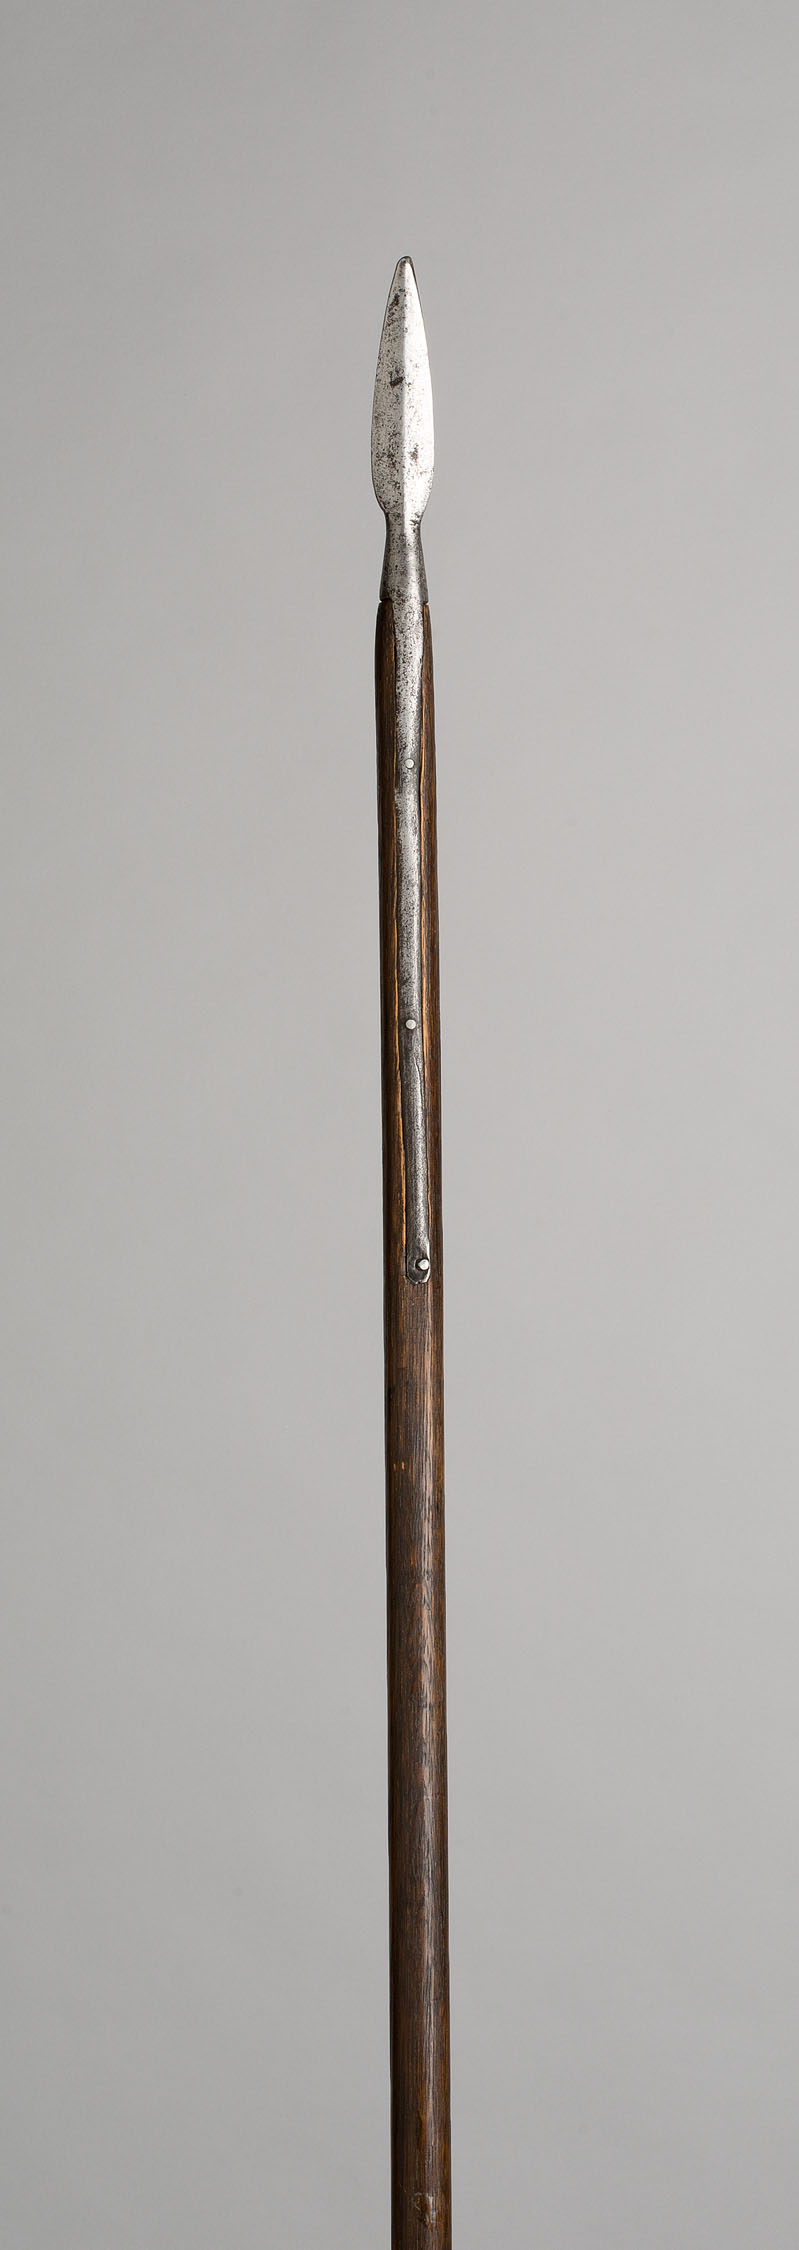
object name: Arms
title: Infantry Pike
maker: German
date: 1700/1800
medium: Steel and wood (oak)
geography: Germany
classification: edged weapon-staff; arms; arms and armor